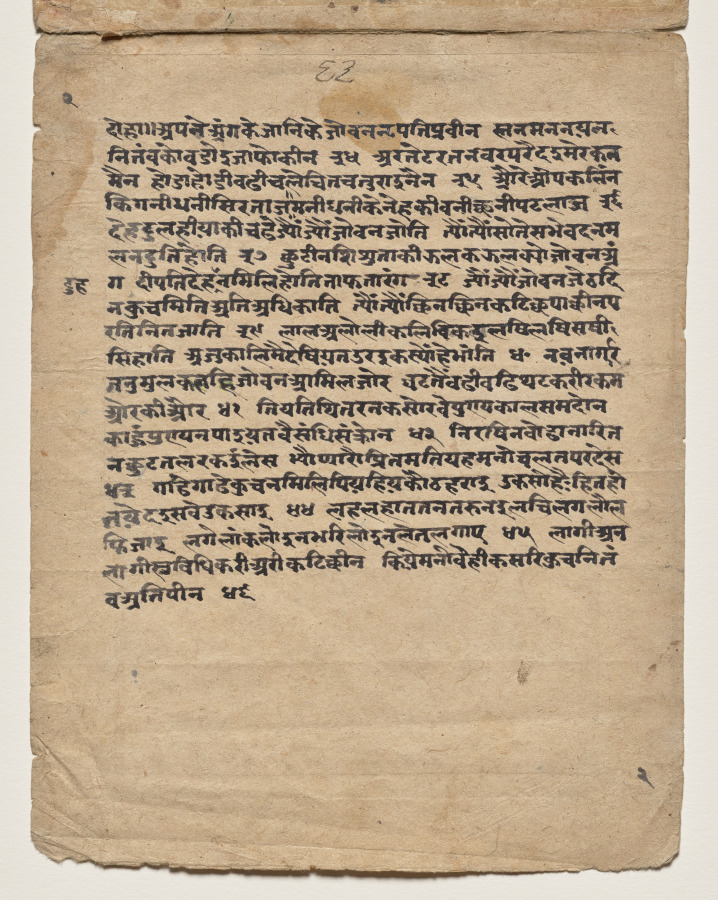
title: The lovelorn heroine, from a Sat Sai of Bihari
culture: Northern India, Pahari kingdoms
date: 1780–90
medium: Gum tempera and gold on paper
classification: Painting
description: The Sat Sai is a collection of poems mainly describing the beauty of women in a range of emotional states. The heroine of this poem sits against a tree that is in full flower, like her, but her lover is absent, and other girls walk by, gossiping. Not coincidentally, her dress matches the color of the blossoms, and no bees come to pollinate.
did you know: The Sat Sai was written for Raja Jai Singh I of Amber (r. 1625–67).